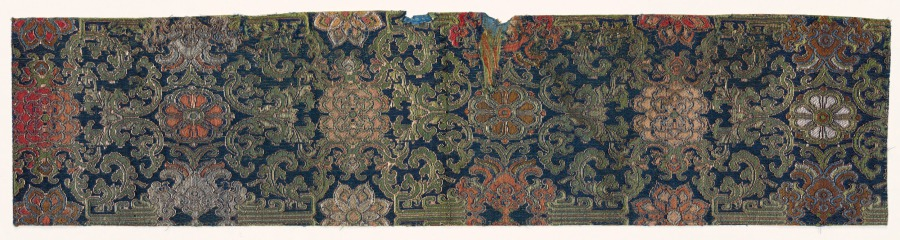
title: Textile Fragment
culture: Japan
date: 1800s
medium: silk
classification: Textile